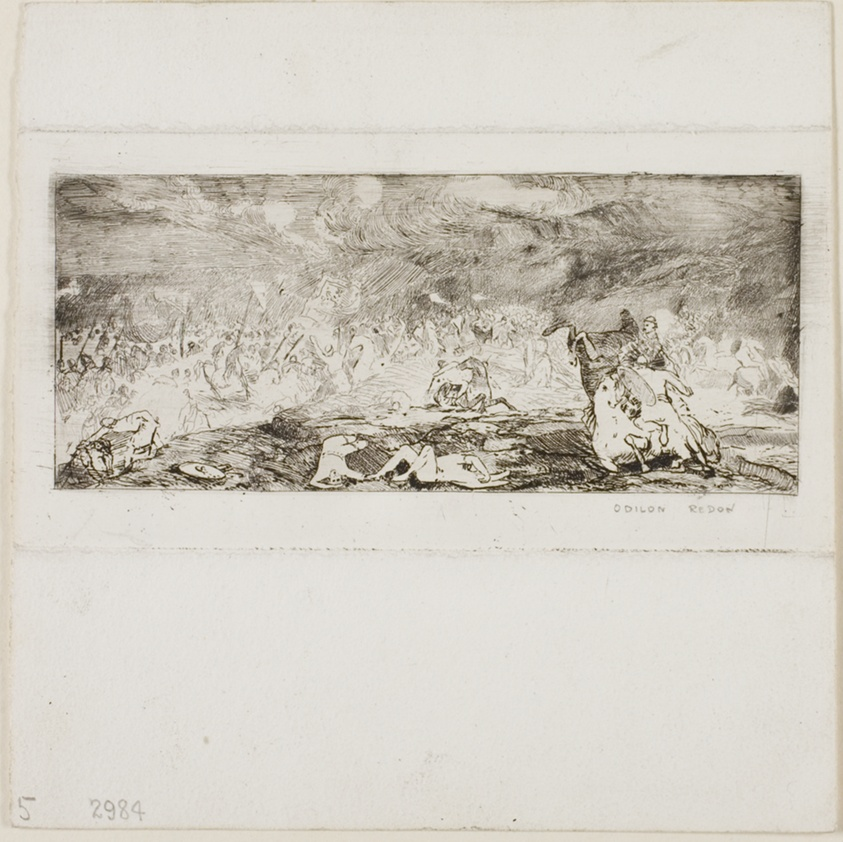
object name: Print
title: Battle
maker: Odilon Redon (French, 1840-1916)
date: 1865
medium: Etching on white wove paper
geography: France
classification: etching; print; prints and drawing; paper